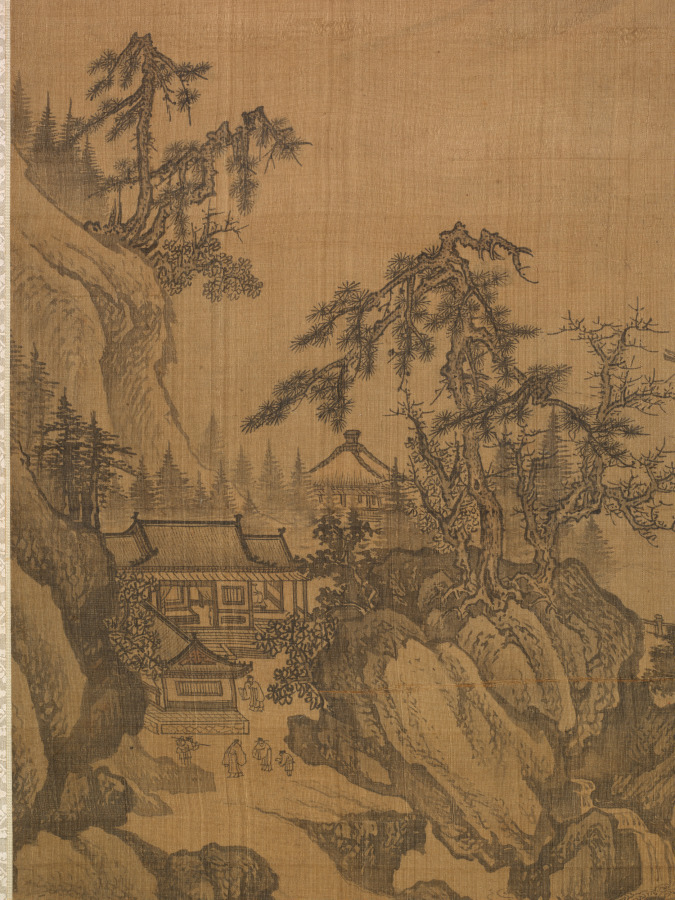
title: Mountain Market, Clear with Rising Mist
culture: Korea, Joseon dynasty (1392–1910)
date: early 1500s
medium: Hanging scroll; ink on silk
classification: Painting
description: This painting depicts several vignettes of the scholar-hermit’s various activities. In the lower left corner, the scholar-hermit is portrayed welcoming his guest in the courtyard. In the middle section on the lower bottom, the scholar and his guest are shown encountering another traveler on the bridge and exchanging their greetings. After crossing the bridge, the scholar visits a friend who lives in a compound of multiple buildings. The two friends decide to take a short walk. Both appear in a terraced cliff, enjoying a mountain vista and the fragrance of an old pine tree carried by the gentle wind. The scholar continues his journey with his two servants. They are portrayed crossing a winding wooden bridge. Right beyond the colossal rocky mountain, a panoramic view to a bustling market place unfolds, suggesting that it may be the place where the scholar-hermit’s entourage would visit. Perhaps the scholar need to buy items such as books, rolls of papers, and brushes, all essential to scholarly life. Toward the upper left corner, another group of travelers is landing on the river bank that leads to the city gate; they may be headed to the multistoried Buddhist stupa nestled on the top of the mountains.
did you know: Due to its stylistic features, this painting has long been believed to be a Chinese painting of the Northern Song period, dated to the 12th century.